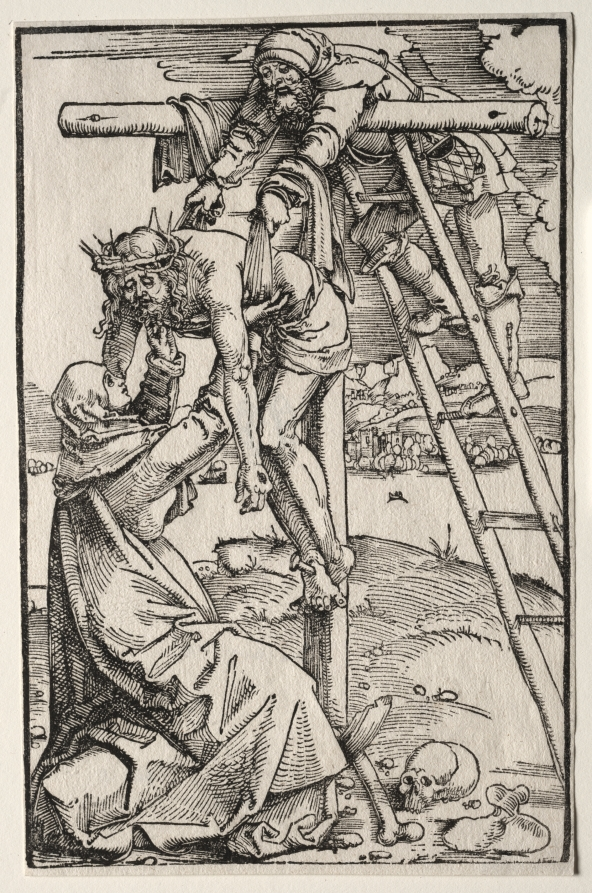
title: Descent from the Cross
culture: Germany, early 16th Century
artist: Hans Baldung (German, 1484/85–1545)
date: 1505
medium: woodcut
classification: Print